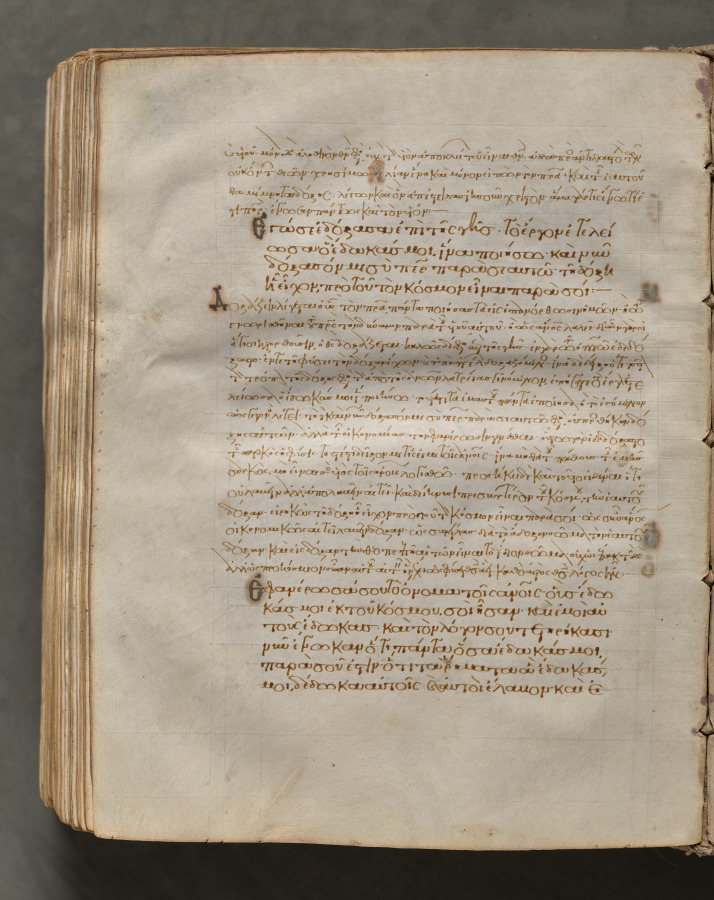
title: Text, folio 403 (verso), from a Gospel Book with Commentaries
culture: Byzantium, Constantinople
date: c. 1000–1100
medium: ink, tempera, and gold on vellum; leather binding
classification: Bound Volume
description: Each of the four gospels in this book opens on a page with brilliantly illuminated borders depicting the author of the text as well as birds—principally peacocks, symbols of the immortality of the soul—and fountains, representing the fountain of life and the salvation of the soul. This volume consists of 428 leaves with texts in Greek. Its level of sophistication suggests that it was probably written and decorated in a monastery in Constantinople.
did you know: Gospel books were carried in procession through Byzantine churches.